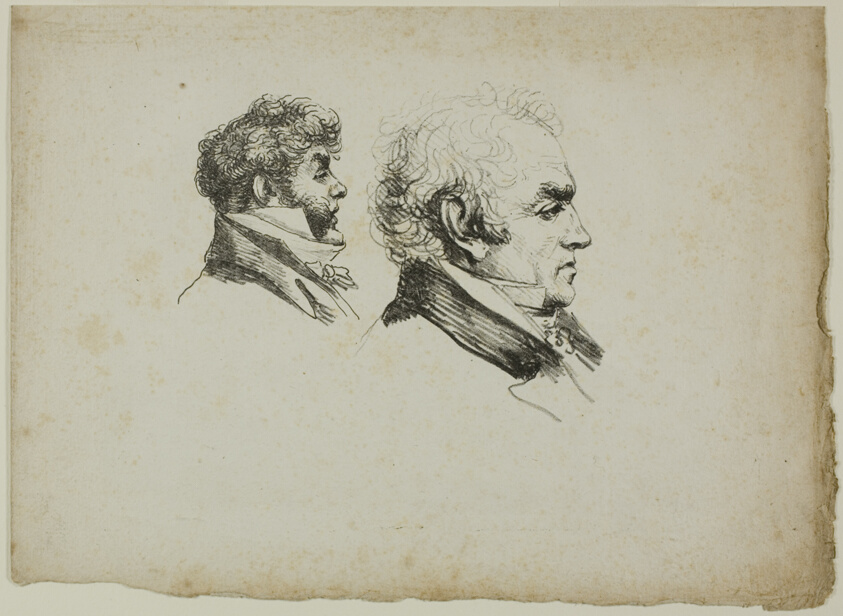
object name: Print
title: Profile Portrait of the Printers Brunet and Lasteyrie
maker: Dominique-Vivant Denon (French, 1747-1825)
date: 1816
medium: Lithograph in black on cream wove paper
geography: France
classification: lithograph; print; prints and drawing